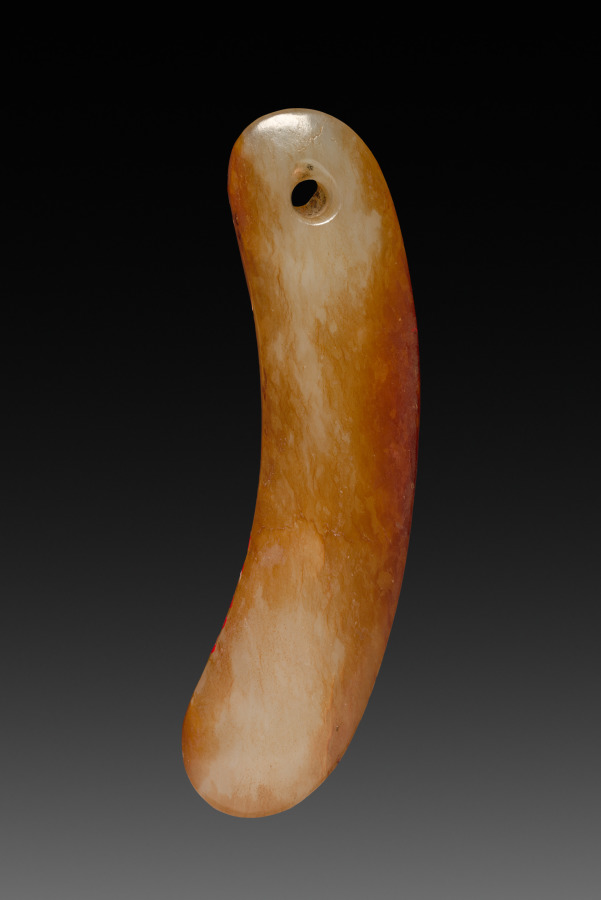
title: Bean-Shaped Bead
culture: China, Han dynasty (202 BCE–220 CE)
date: 206 BCE–220 CE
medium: jade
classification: Jade